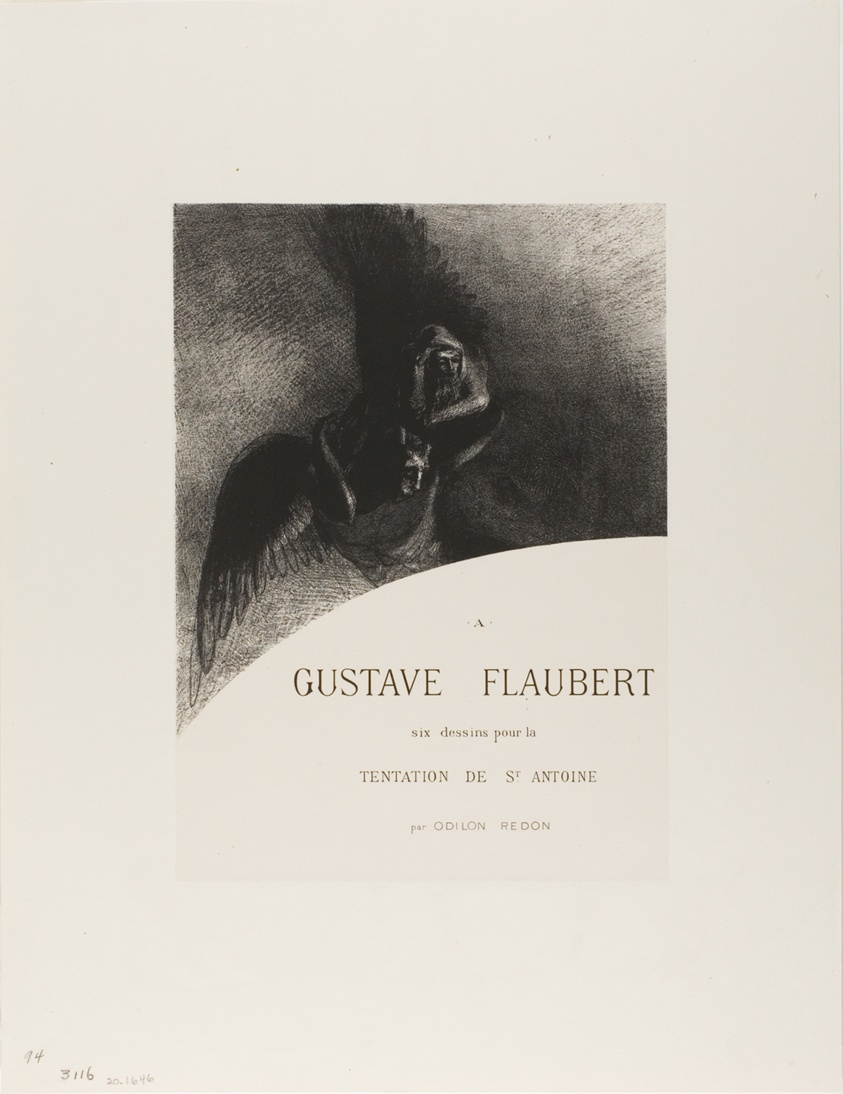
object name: Print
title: Frontispiece to A Gustave Flaubert (To Gustave Flaubert)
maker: Odilon Redon (French, 1840-1916)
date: 1889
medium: Lithograph in black on ivory China paper laid down on ivory wove paper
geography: France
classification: lithograph; print; prints and drawing; paper